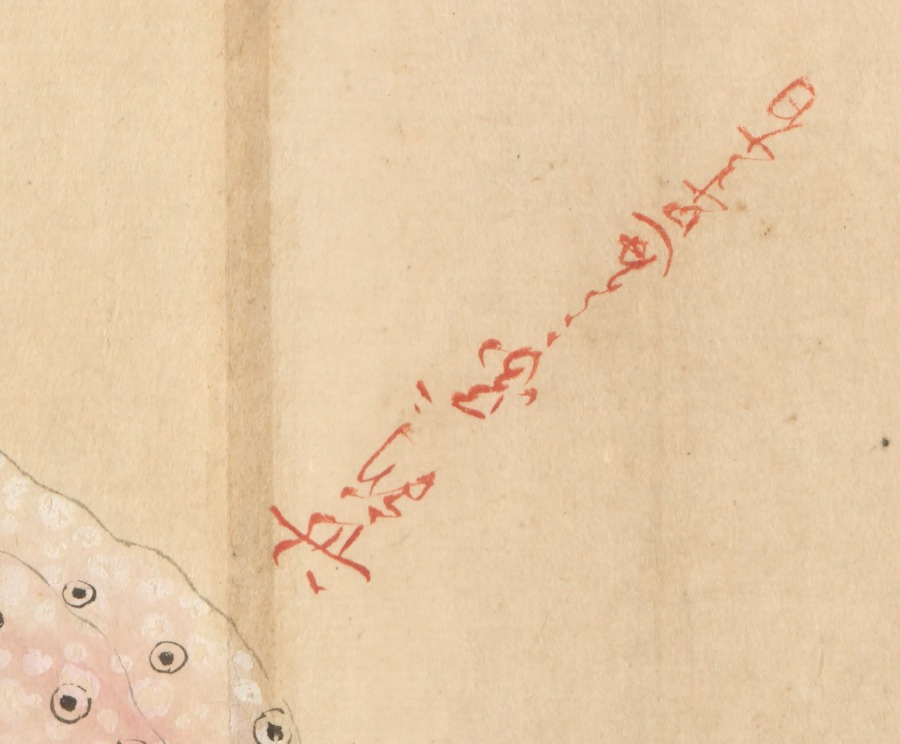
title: Tortoise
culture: Japan, Edo period (1615–1868)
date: 1700s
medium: watercolor on paper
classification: Painting